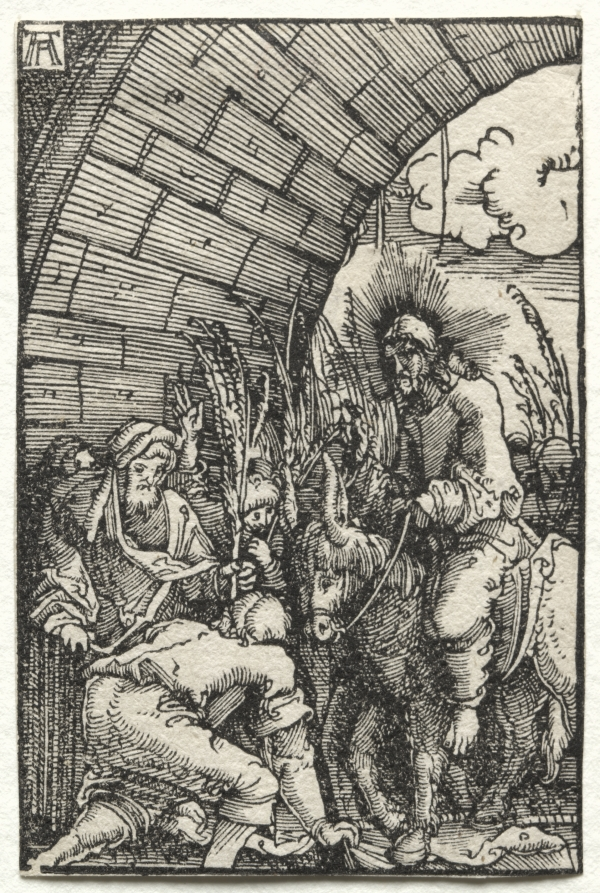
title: The Fall and Redemption of Man: The Entry into Jerusalem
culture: Germany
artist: Albrecht Altdorfer (German, c. 1480–1538)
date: c. 1515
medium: woodcut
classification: Print